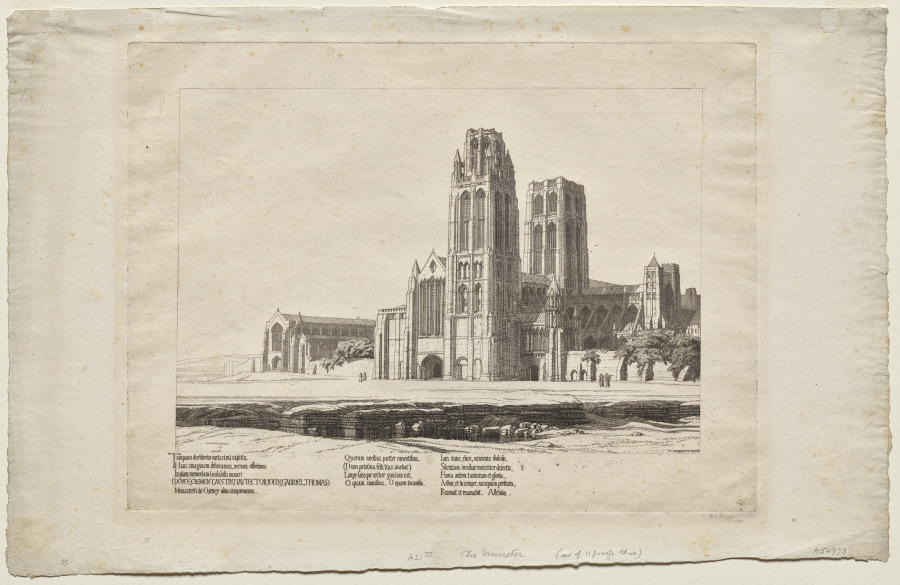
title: The Minster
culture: England, 20th century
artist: Frederick Landseer Maur Griggs (British, 1876–1938)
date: 1918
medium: etching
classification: Print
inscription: signed in graphite, lower right margin: F.L. Griggs